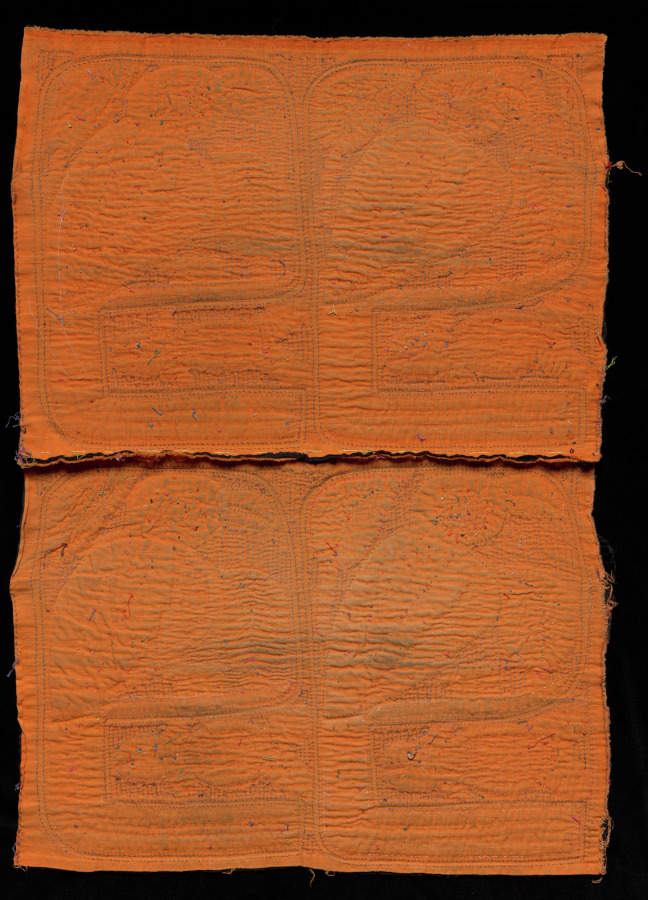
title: Birds and Fish Mola Panels (Pair)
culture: Republic of Panamá, Gunayala Comarca, Guna people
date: 1900s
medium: Cotton; reverse appliqué, appliqué, embroidery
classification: Garment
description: These two, nearly identical panels were created by a female artist of the Guna, an Indigenous people of the Republic of Panamá. Originally, they were stitched into the front or back of a blouse (mola). Such blouses are so distinctive to the Guna that they are the single most recognizable element of Guna cultural identity.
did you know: Such panels originally were sewn into blouses known as molas.